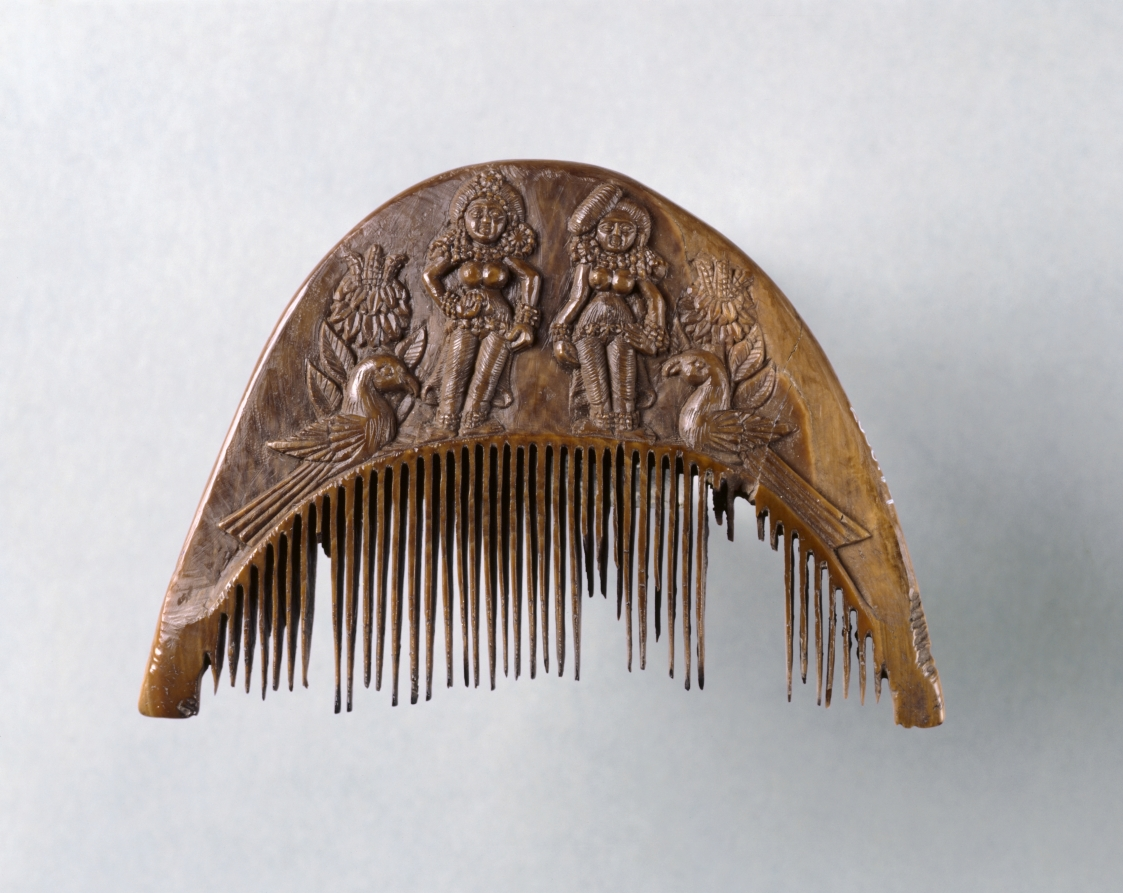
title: Comb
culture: India, Bengal, Chandraketugarh area, Shunga period (185–78 BCE)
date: 200 BCE–100 CE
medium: ivory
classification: Ivory